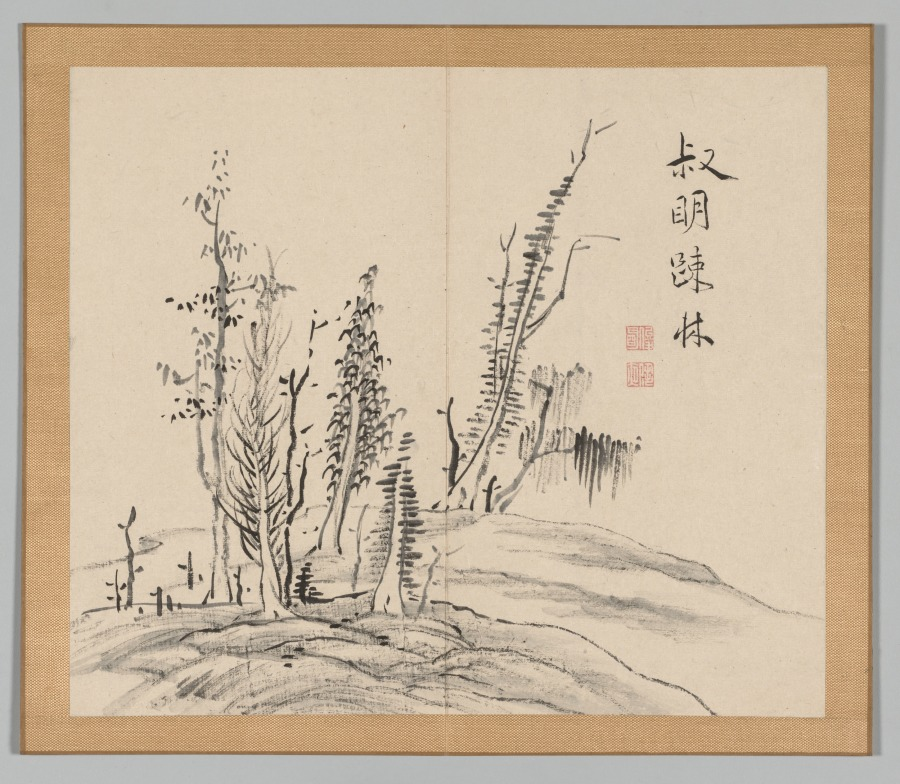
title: Reverberations of Taiga, Volume 2 (leaf 17)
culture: Japan, Edo period (1615–1868)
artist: Aoki Shukuya (Japanese, d. 1802)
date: mid- to late 1700s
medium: double-leaf from a pair of albums; ink and light color on paper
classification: Portfolio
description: Traditionally, young painters in Japan began their studies with an established master-painter. The master's compositions invariably became models that the apprentice copied to learn various ink and brush techniques. Shukuya was a pupil of the famous Kyoto artist Ikeno Taiga, whose style is reflected in these sketches of rocks, trees, and mountains.